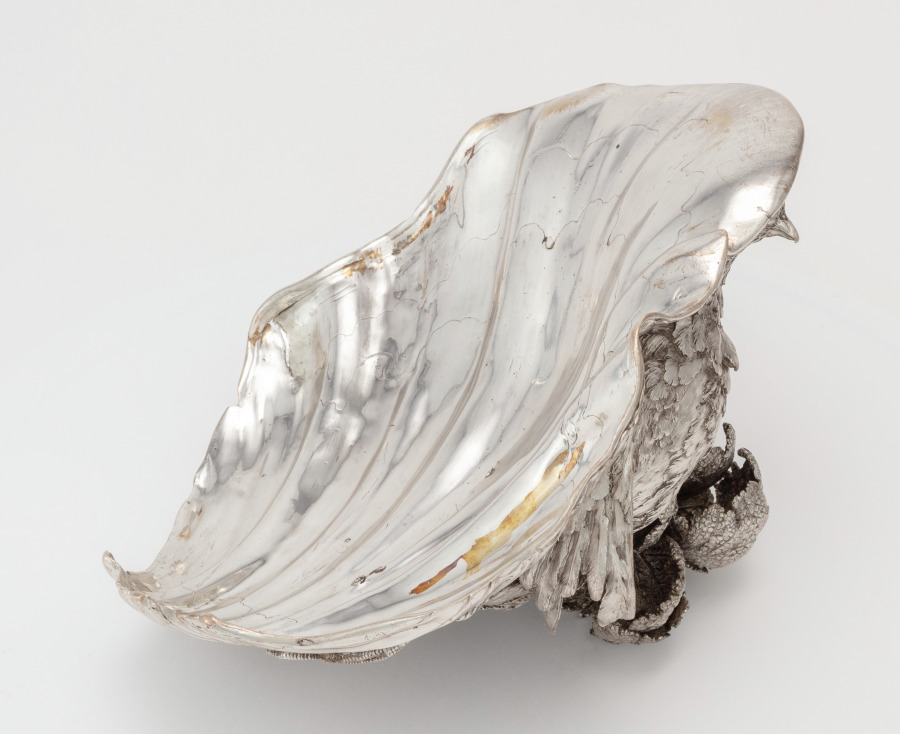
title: Cover for a Tureen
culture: France, Paris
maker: Henry Adnet (French, 1745)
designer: Juste-Aurèle Meissonnier (French, 1695–1750)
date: 1735–38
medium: silver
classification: Silver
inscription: engraved Meissonnier signature.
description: See entry for cover record 1977.182.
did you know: The langoustine, pigeon, and vegetables were cast using real examples giving the silver copies lifelike detail and appearance.